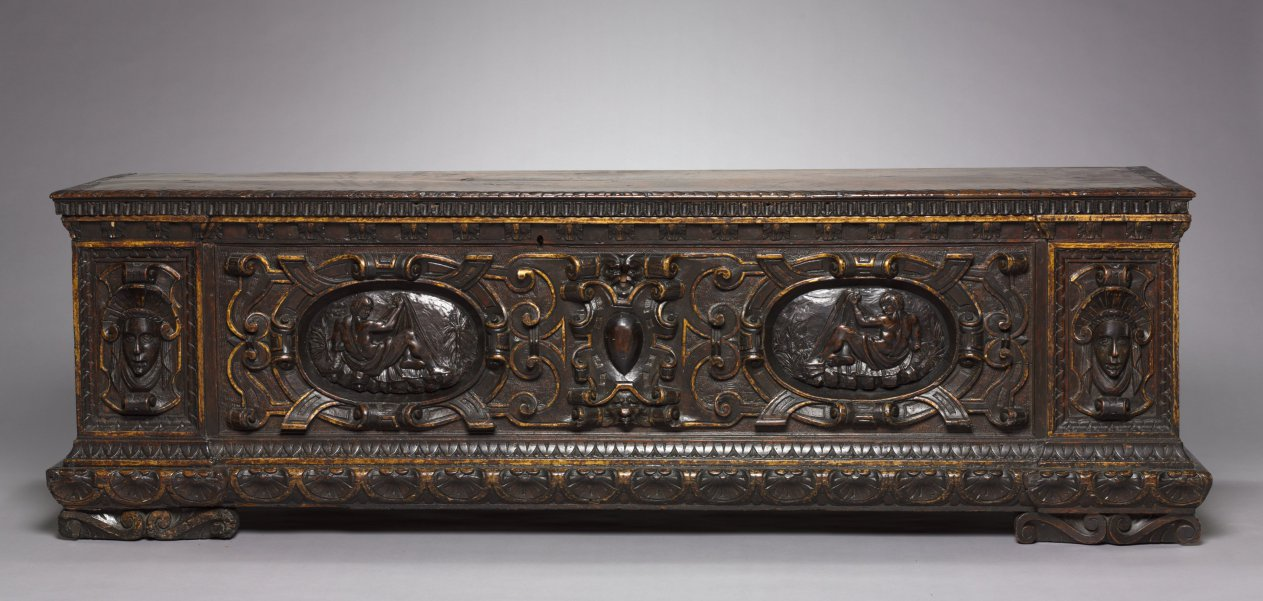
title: Cassone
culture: Italy, Venice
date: mid-1500s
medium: walnut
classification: Furniture and woodwork